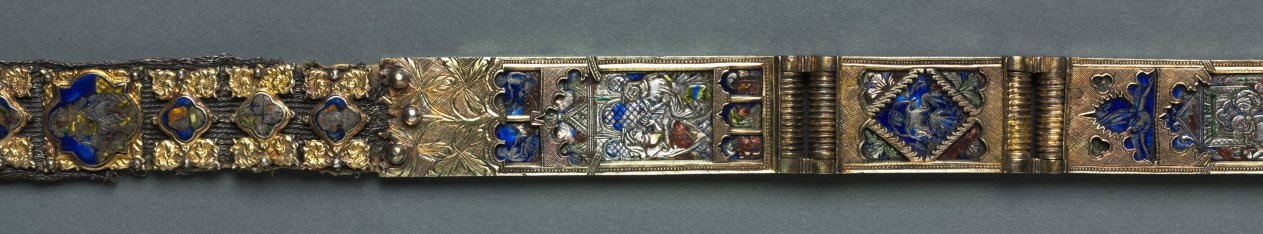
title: Belt for a Lady's Dress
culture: Italy, Siena(?)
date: c. 1375–1400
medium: basse-taille enamel and gilding on silver, silver thread, gilt-silver buckle, cast and chased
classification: Jewelry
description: Because of its extraordinary richness, this belt (also known as a girdle) was both an ornament for the body and an object of great personal luxury. Almost eight feet in length, belts like this were at the height of fashion for both men and women. After being passed around the waist and through the buckle, one end of the belt would fall to the hem of the garment. The belt's many colorful enamel plaques are worked in translucent enamel over decoration engraved into the silver beneath (an enameler's technique known as basse-taille). Within the plaques and cast into the buckle are scenes of courtly love, musicians, and fantastic animals. A large number of translucent enamels were made for secular objects during the late Middle Ages for use on jewelry, cups, garment clasps, and similar objects. This belt is a rare survival among these now scarce objects.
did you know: Look closely at the tiny scenes of courtly love on the plaques that adorn this belt. Given their size, these scenes were designed for the enjoyment of the woman who wore this belt over a sumptuous dress rather than an admirer from a distance.